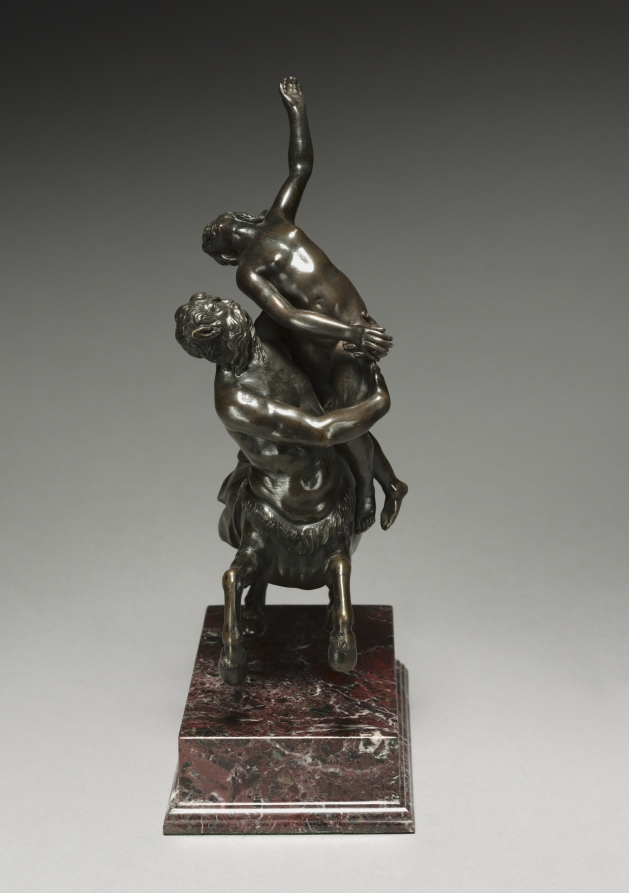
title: Nessus and Deianeira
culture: Italy, 17th century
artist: Francesco Fanelli (Italian, 1661)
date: made in England, probably 1630–40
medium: bronze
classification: Sculpture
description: Fanelli apparently came from Florence and this group clearly indicates that he was familiar with the work of Giambologna, the leading sculptor active in that city around 1600.